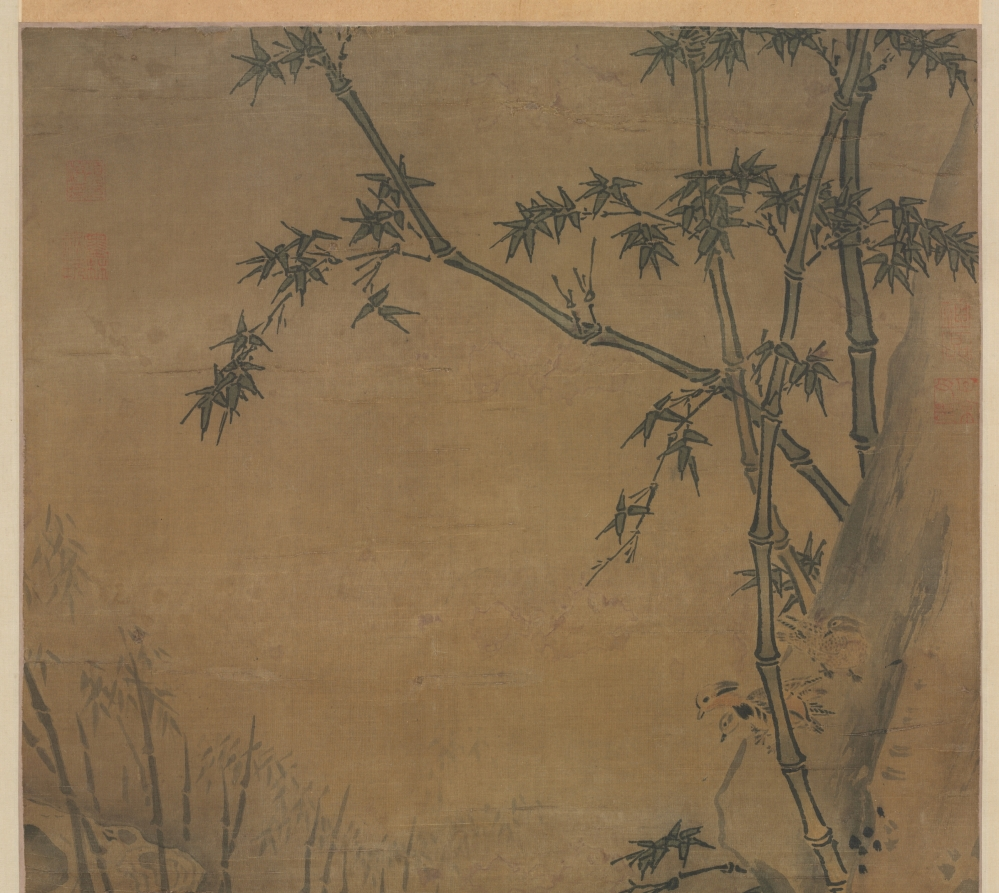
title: Bamboo and Ducks by a Rushing Stream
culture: China, Southern Song dynasty (1127–1279)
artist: Ma Yuan (Chinese, c. 1150–after 1255)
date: 1127–1279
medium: hanging scroll; ink and light color on silk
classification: Painting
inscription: 馬遠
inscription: 12 additional seals: 1 of An Kuo (1481–1534); 7 of Hsiang Yüan-pien (1525–1590); 2 of Liang Ch'ing-piao (1620–1691); 2 unidentified. (WKH)